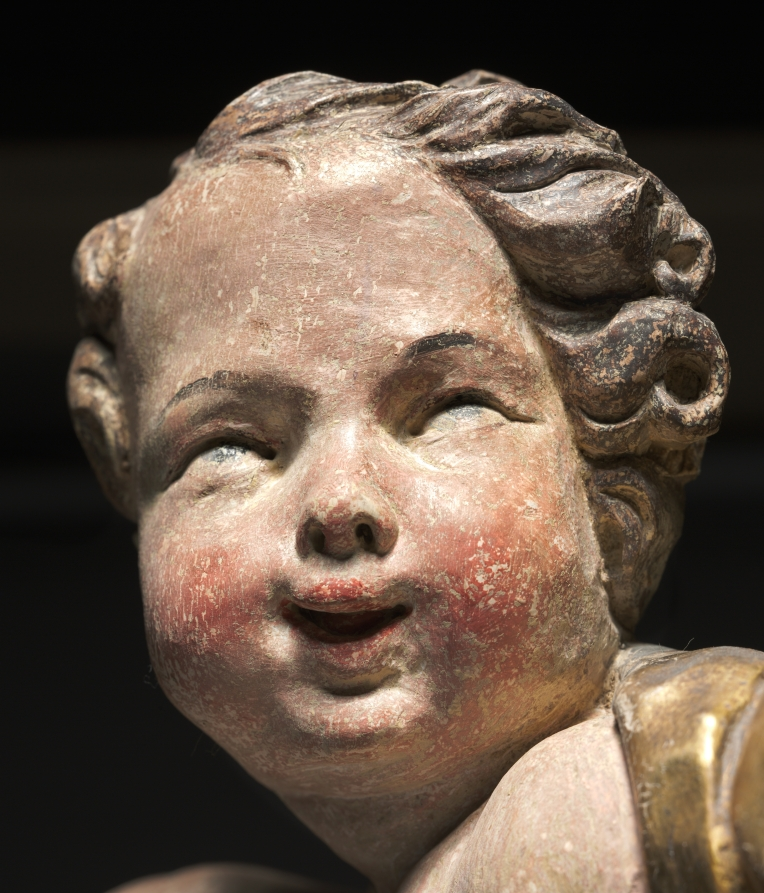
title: Putto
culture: Germany, near Bamberg, 18th century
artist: Ferdinand Tietz (Austrian, 1708–1777)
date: mid-1700s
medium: painted and gilded wood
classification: Sculpture